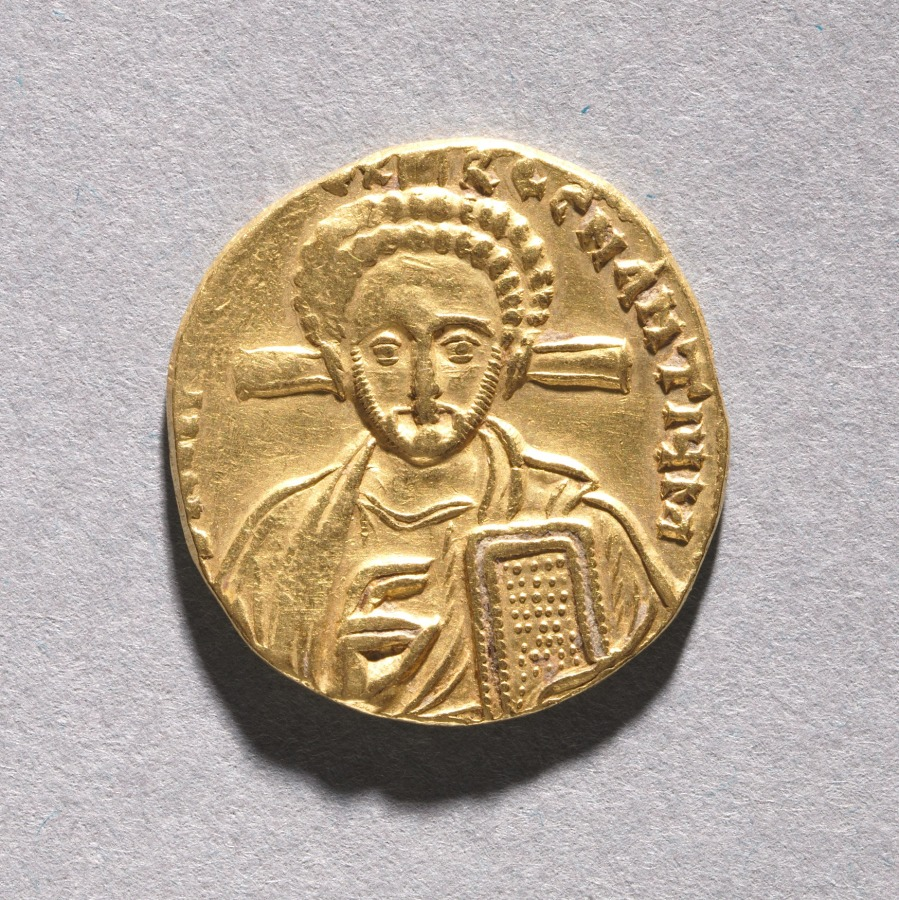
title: Solidus with Justinian II Rhinometus and His Son Tiberius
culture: Byzantium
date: 705–711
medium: gold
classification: Coins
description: The vast number of surviving Byzantine coins attests to the level of trade across the empire. Controlled and supervised by the emperor, the producers of coins took care to represent his authority and reflect his stature. Talented artists were recruited to engrave the dies (molds) used for the striking of coins. Emperors increasingly came to include their heirs and co-emperors on their coinage, as well as other family members or even earlier rulers. Coins were recognized, then as now, as small, portable works of art. With their inscriptions and images, Byzantine coins provide valuable documentation of historical events and a record of the physical appearance of the emperors. The coins shown here include the solidus, the basic gold coin of 24 karats; the tremissis, a gold coin of one-third the weight and value of the solidus; and the nomisma, which in the 10th century replaced the solidus as the standard gold coin.